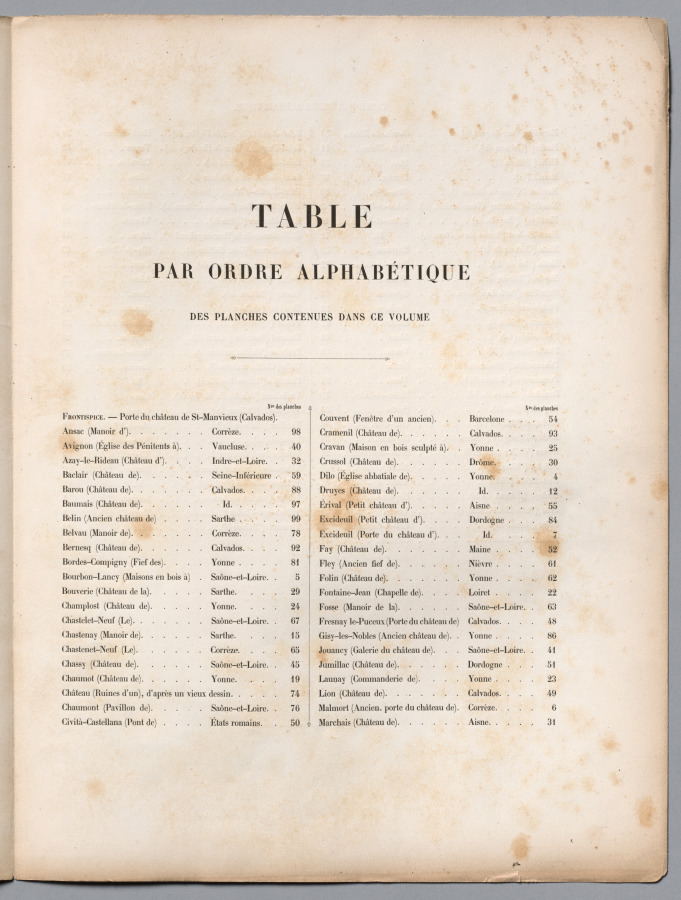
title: Architecture Pittoresque ou Monuments des xveme. Et xvieme. Siecles: Chateaux De France des XV et XVI Siecles: Title Page and Table of Contents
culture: France, 19th century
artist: Victor Petit (French, 1817–1874)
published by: Charles Boivin (publisher and editor); Lith de Godard a Paris (printer)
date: published 1860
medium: lithograph with tint stone, from portfolio of 100 lithographs with tint stone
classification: Portfolio